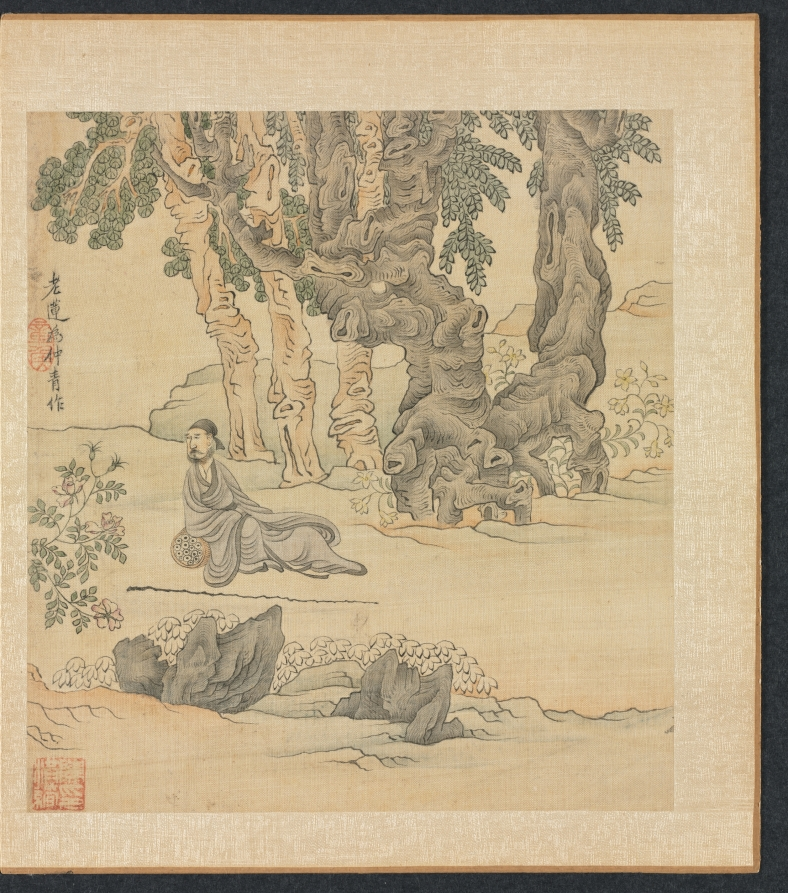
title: Paintings after Ancient Masters: Portrait of Zhongqing in a Landscape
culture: China, Ming dynasty (1368–1644)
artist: Chen Hongshou (Chinese, 1598/99–1652)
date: 1598–1652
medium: album leaf; ink and color on silk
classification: Painting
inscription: Laolin painted for Zhongqing. [2 Seals] Zhanghou; Chen Hongshou yin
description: The twenty paintings in this double-album by Chen Hongshou include landscapes, figures, and flowers. It also has one leaf featuring a woman, an often-used subject not found in the other albums from the latter part of his career. His late works are wonderful summations of Chen's peculiar and quirky art--archaistic, hyper-refined--but without accompanying shallowness or sentimentality. His figures and landscapes in the late albums are miniaturized, not unlike the small Chinese gardens, or the carefully selected small table rocks or old roots used for contemplation to see the world in miniature. This loss of scale is quite deliberate and reflects the psychological situation of a depressed class like the Ming loyalist officials and scholars, deprived of their integrity and honor, and forced to lead a diminished and restricted existence.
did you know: This is a portrait of the artist's friend, Lin Zhongqing, for whom he made this album.